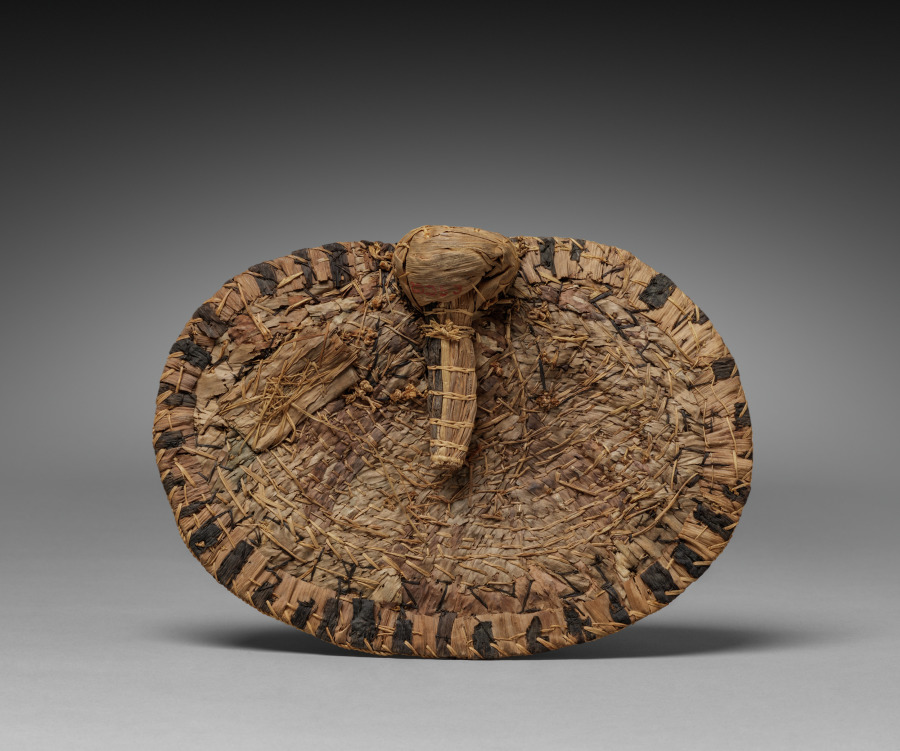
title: Back Skirt/Sitting Pad (negbe)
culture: Africa, Central Africa, Democratic Republic of Congo, Mangbetu-style makers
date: by 1928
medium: Plant fibers and dye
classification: Garment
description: Egbe (singular: negbe) were fashionable and practical garments aristocratic Mangbetu women made for special occasions. Worn over a skirt, it tied onto a girdle along with a frontal “apron.” The curved interior piece rested on the lower back. Thickly woven, flexible natural fibers bent with the body, cushioning the wearer’s behind when sitting. When the woman was standing, the decorated flat portion faced outward, showing off bold geometric motifs. Egbe were among items sold to foreigners at the Mangbetu king’s encouragement as the Mangbetu actively constructed their self image for outsiders during the 1920s and 1930s.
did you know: A curved "handle" on the negbe's interior allowed it to rest on the tailbone.